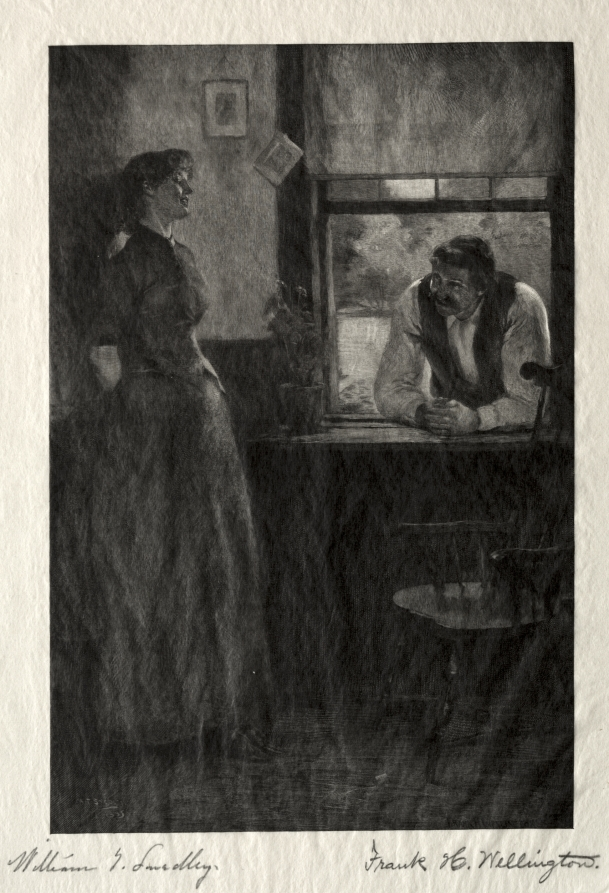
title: One Day in June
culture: America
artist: Frank H. Wellington (American, 1858–1911)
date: 1887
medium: wood engraving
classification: Print